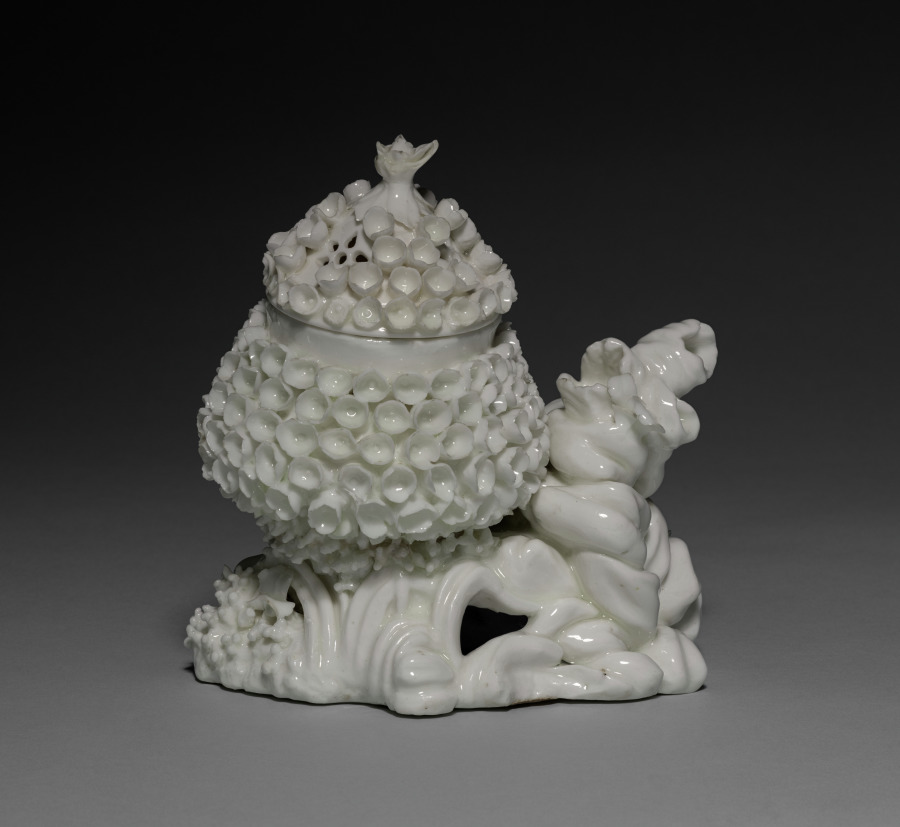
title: Potpourri Vase with Cover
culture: France, Vincennes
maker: Mennecy Factory (French)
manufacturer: Vincennes Porcelain Factory (France, 1740–56)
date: c. 1750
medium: soft-paste porcelain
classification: Ceramic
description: The delicate flowers that cover the lid and base of this vase draw inspiration from the schneeballblüten, or guelder rose, pattern produced at the German Meissen porcelain factory. The flowers on the lid are spaced by small, unobtrusive perforations that allow the scent of the potpourri, a mixture of flowers, herbs, and spices placed inside this vase, to disperse.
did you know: This style of potpourri vase, a pot atop a rockwork base, was popularly produced by major 18th-century porcelain factories including those at Vincennes, Chantilly, and Saint-Cloud.